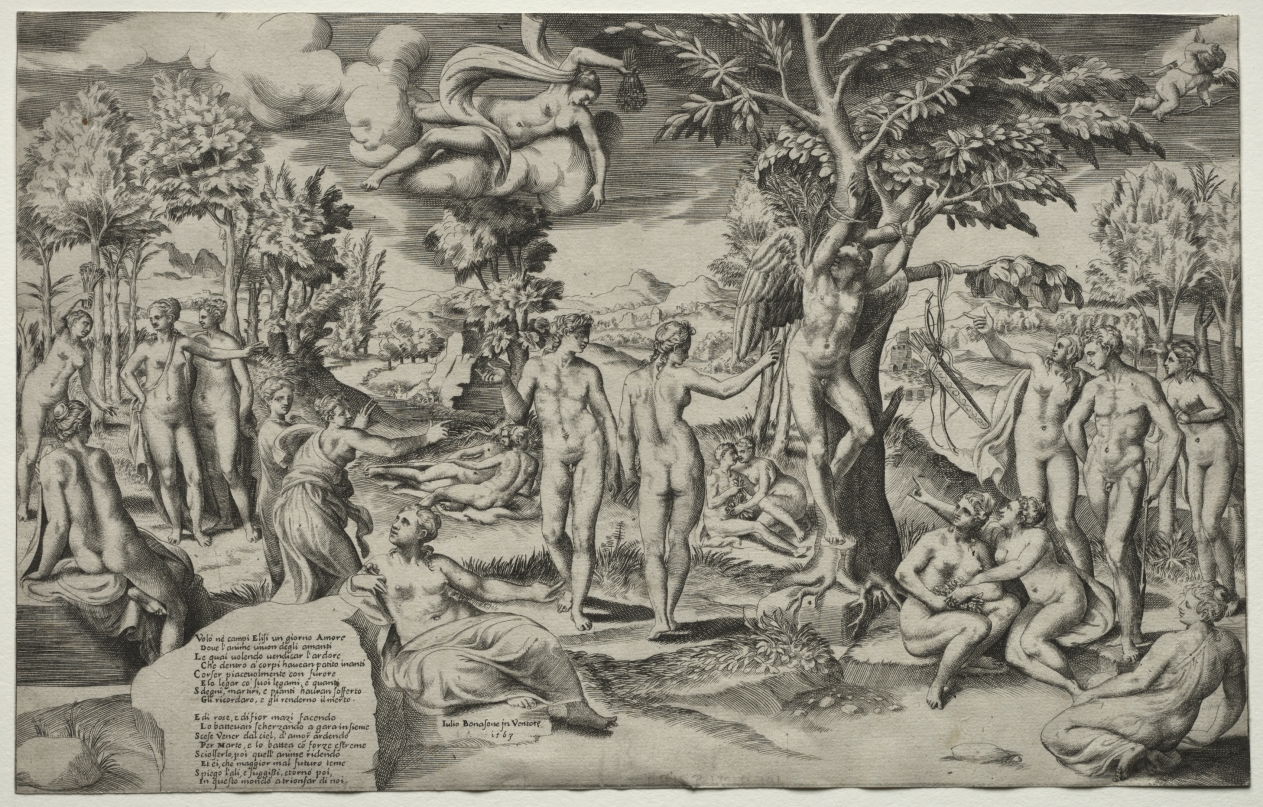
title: Love in the Elysian Fields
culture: Italy, 16th century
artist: Giulio Bonasone (Italian, c. 1510–after 1576)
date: 1563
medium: engraving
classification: Print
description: In this engraving Cupid is shown being punished by those he tormented, a popular subject of Hellenistic art and literature revived in the Renaissance. Bound to a tree in the Elysian Fields, a dwelling place for the virtuous dead, Cupid is watched by the laughing souls of lovers as Venus descends from the sky to beat him with a bouquet of flowers in retribution for the great pain that passion often inflicts. According to the verses on the rock at left, after being whipped Cupid will be set free to escape again "to this world where he triumphs over us."